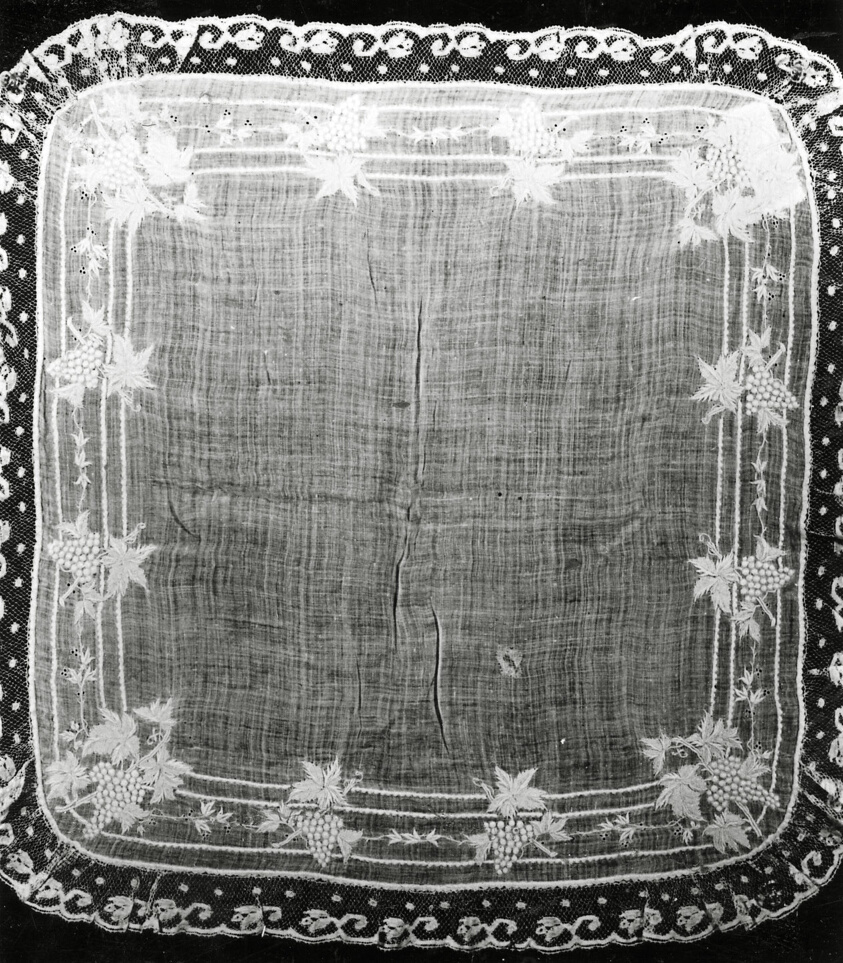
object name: Textile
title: Handkerchief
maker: France (needlework) and Belgium (lace border)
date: 1875/1900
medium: Linen, plain weave; embroidered with cotton in back, buttonhole, eyelet, overcast, and padded satin stitches; couching; edged with cotton, bobbin straight lace of a type known as "Valenciennes"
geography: France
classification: textile; needlework (visual works); accessories (object genre); weaving